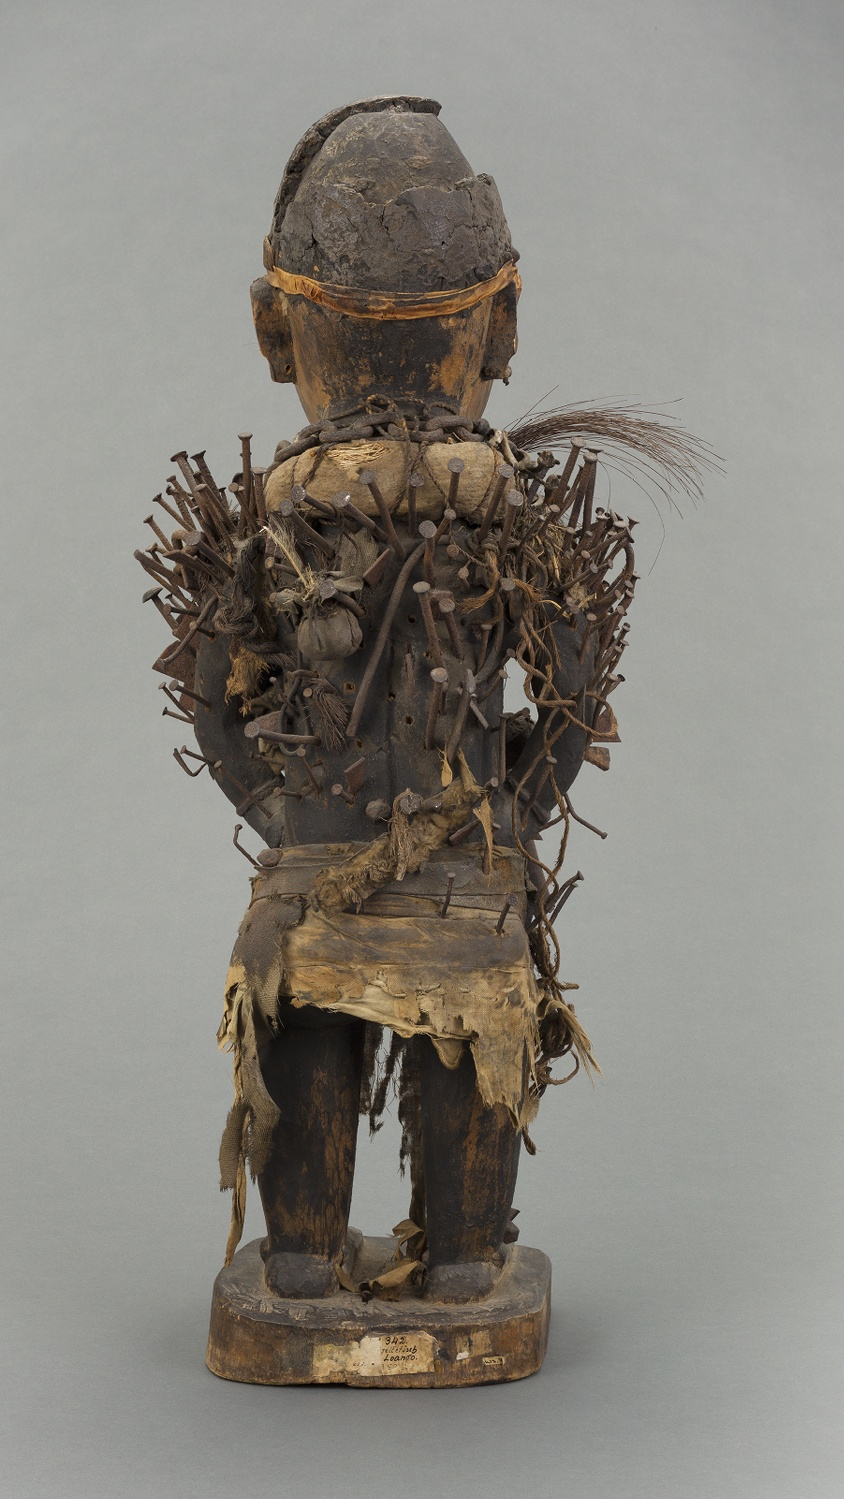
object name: Sculpture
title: Male Figure (Nkisi Nkondi)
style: vili, Arts of Africa, african Art, Central Africa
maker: Kongo: Vili; Republic of the Congo; Central Africa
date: Probably early to mid-19th century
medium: Wood, metal, glass, fabric, fiber, cowrie shells, bone, leather, gourd, and feathers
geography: Republic of the Congo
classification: sculpture; wood; arts of Africa; medicine object; african art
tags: ritual objects, religion, contracts, medicine, sacred, supernatural